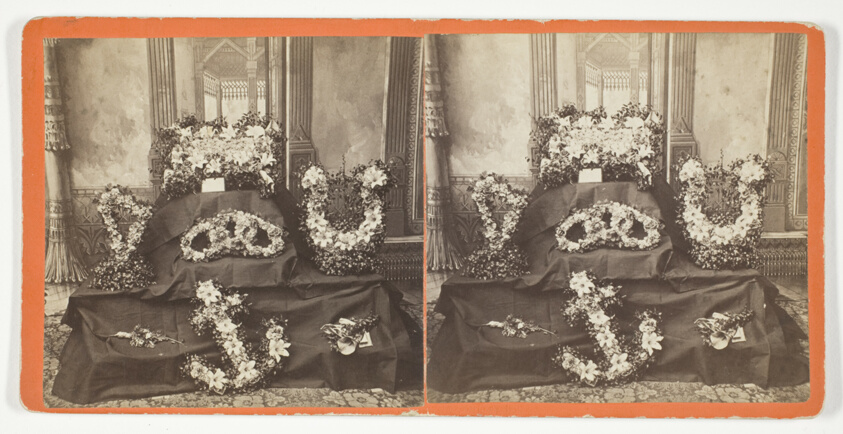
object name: Photograph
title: Untitled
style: 19th century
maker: Artist unknown; American, late 19th century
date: 1875/99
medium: Albumen print, stereo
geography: United States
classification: photography; photograph